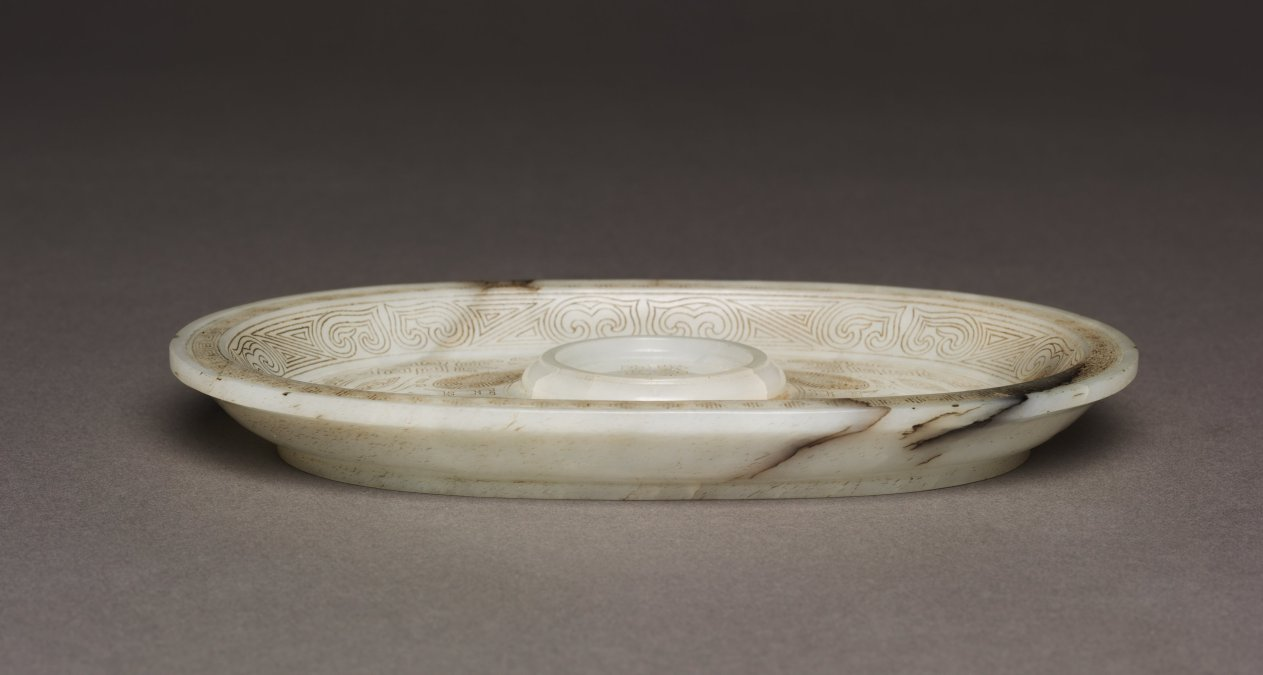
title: Oval Cup Stand with Animal Masks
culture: China, Qing dynasty, Qianlong mark and period (1736–95)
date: 1736–95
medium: white jade with black markings and incised decoration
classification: Jade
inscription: 乾隆年制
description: This tablet is engraved with minuscule characters; the inscribed text is an essay by the Qianlong emperor. The supreme jade quality and similar carving style (for example, the sharp inverted edges) suggest that this jade scepter could have been made during the 1700s with the artistic intent to "model after the past."